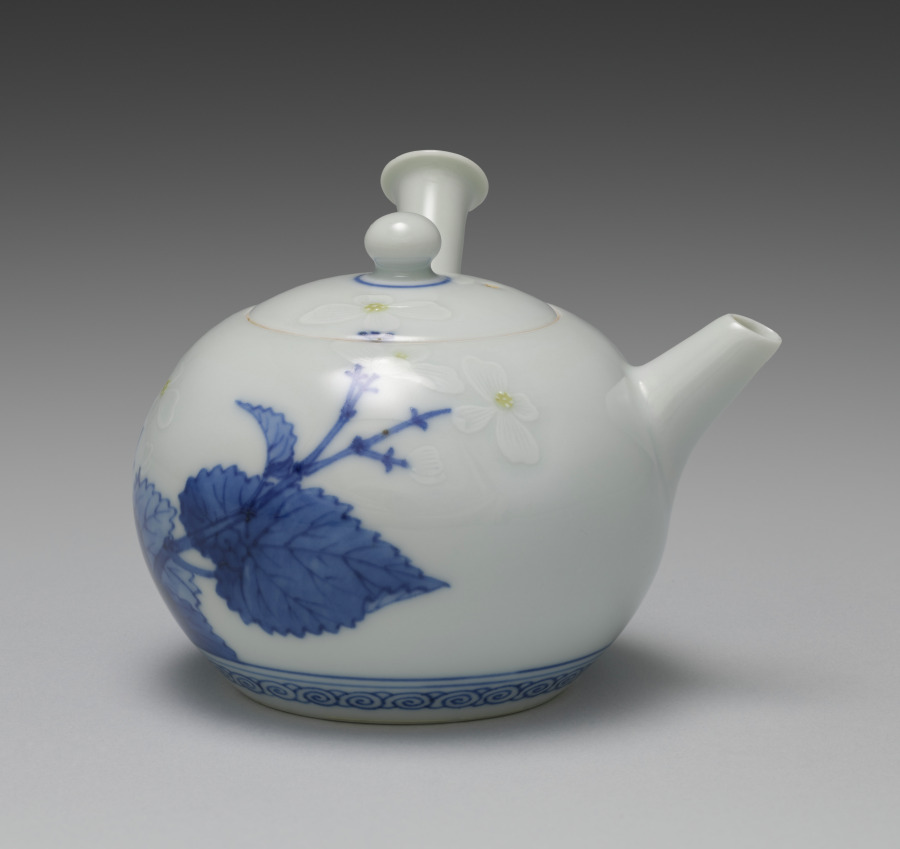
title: Teapot with Begonias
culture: Japan, Meiji period (1868–1912)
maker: Seifū Yohei III (Japanese, 1851–1914)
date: 1897–1914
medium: Porcelain with underglaze and overglaze colors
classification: Ceramic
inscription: 清風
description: This teapot has complex surface treatment: a design of begonias in modulated underglaze blue for the leaves and stems as well as thick overglaze white with incised lines to define the petals, plus small areas of underglaze yellow at their low-relief centers. A band of underglaze blue gives further definition to the lid’s handle, and the area just above the base has a double band of blue above a row of snail-shell curls. Unlike many other teapots, which have marks on their bases, this one has “Seifu” incised into one of its sides in relatively large characters. It is the side that would face the host if the teapot were held by the handle with the right hand, which would be the expectation.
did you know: This teapot with begonias combines underglaze blue with subtle use of yellow and white enamels.